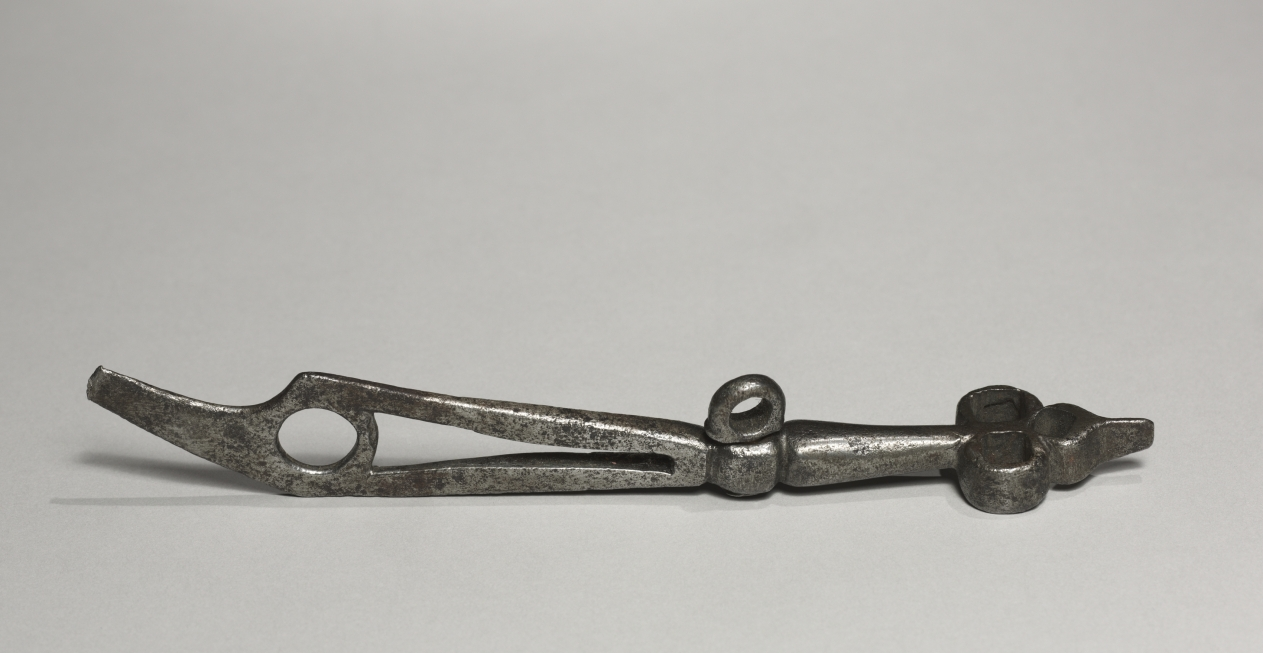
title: Spanner for a Wheel Lock Gun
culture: Germany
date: 1600s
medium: steel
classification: Arms and Armor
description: Early firearms required many different tools to operate. These tools did not have to remain purely practical but could be decorated and embellished. A spanner was integral to a wheel lock gun. The wheel lock works by spinning a spring-loaded steel wheel against a piece of pyrite to generate intense sparks, which ignite gunpowder in a pan, which flashes through a small touchhole to ignite the main charge in the firearm's barrel. The spanner was needed to turn the wheel and spring, readying the gun to be fired.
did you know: This spanner operated a wheel-lock mechanism that enabled a gun to fire.